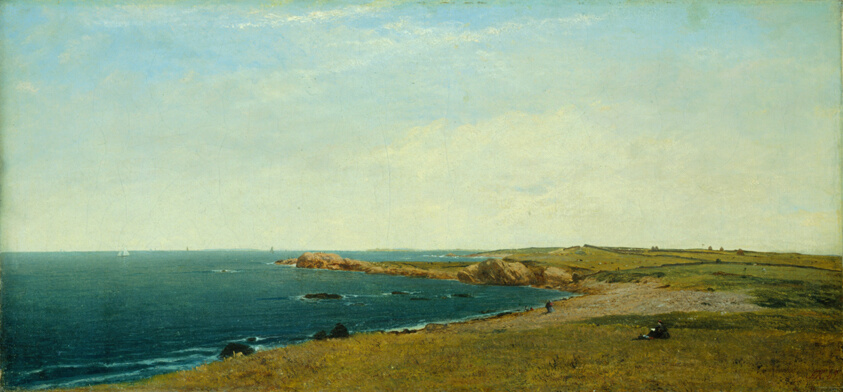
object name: Painting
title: Near Newport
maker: John Frederick Kensett (American, 1816–1872)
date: 1869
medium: Oil on canvas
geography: Newport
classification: painting; american arts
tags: landscapes